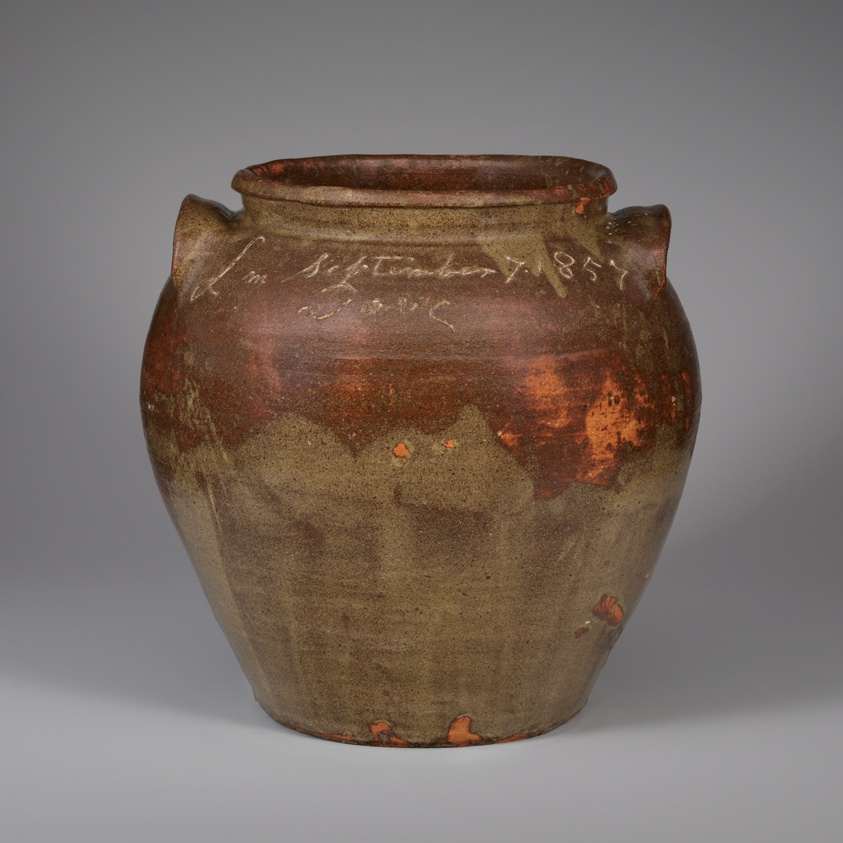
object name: Ceramics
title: Storage Jar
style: 19th century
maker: David Drake (American, c. 1801–1870s); Lewis Miles Stoney Bluff Manufactory [plantation] (American, c. 1840–70s); Edgefield, South Carolina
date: 1857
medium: Stoneware and glaze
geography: Edgefield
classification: container; american decorative arts; pottery; ceramics; stoneware; vessel; decorative arts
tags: storage